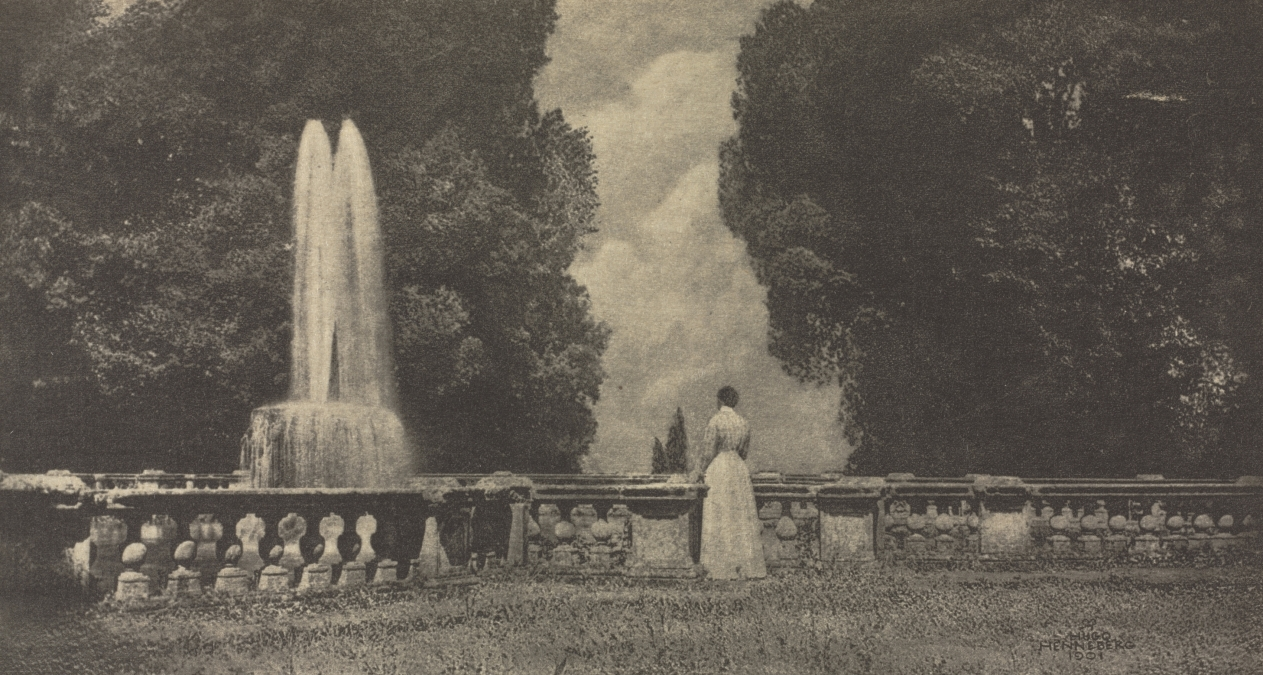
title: Camera Work: Villa Torlonia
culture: Austria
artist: Hugo Henneberg (Austrian, 1863–1918)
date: 1906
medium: photogravure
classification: Bound Volume